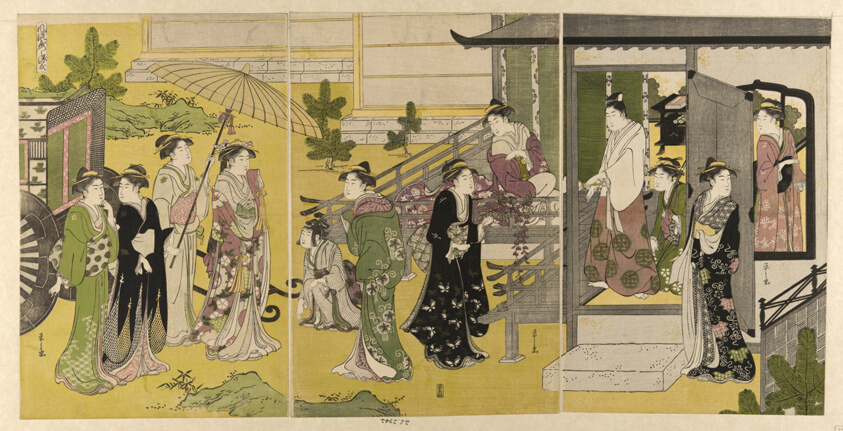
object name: Print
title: Fuji no uraba, from the series "A Fashionable Parody of the Tale of Genji (Furyu yatsushi Genji)"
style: Japanese (culture or style)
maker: Chobunsai Eishi; Japanese, 1756-1829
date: c. 1789/94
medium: Color woodblock print; oban triptych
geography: Japan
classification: woodblock print; print; asian art